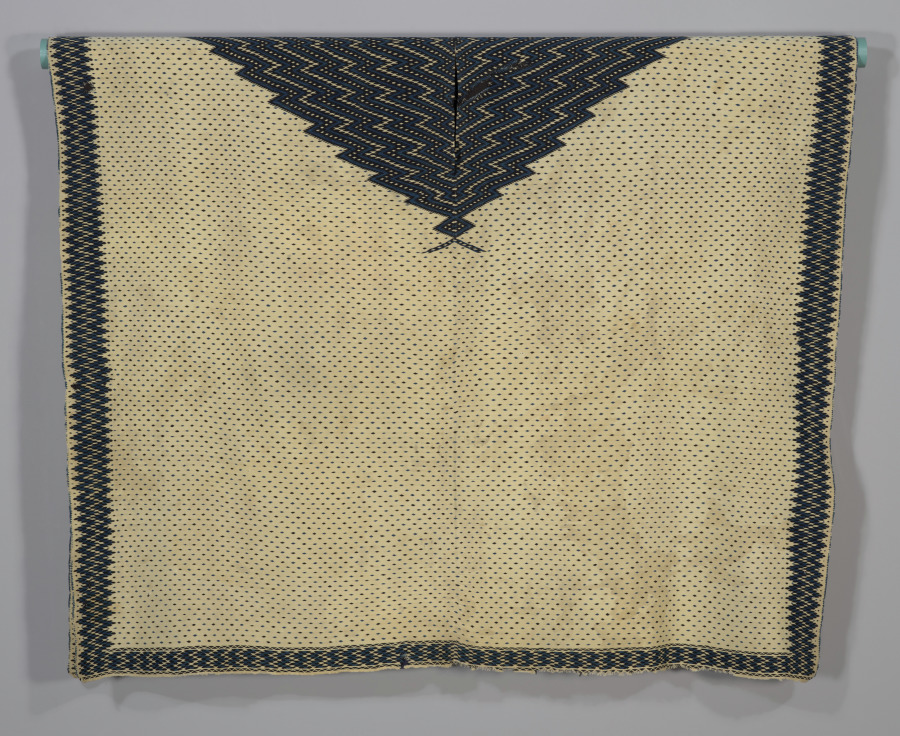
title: Saltillo Sarape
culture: Mexico, Coahuila state, Saltillo Region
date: c. 1820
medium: Wool, cotton; tapestry weave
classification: Textile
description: The sarape (wearing blanket) is a classic Mexican men’s garment that became a symbol of national identity and pride after Mexico achieved independence from Spain in 1821. Examples woven between about 1750 and 1875 in Saltillo, a town in northern Mexico, are the sarape’s most famous representatives, prized for their design, color, and technical refinement.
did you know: Saltillo sarapes (wearing blankets) are prized for their design, color, and technical refinement.